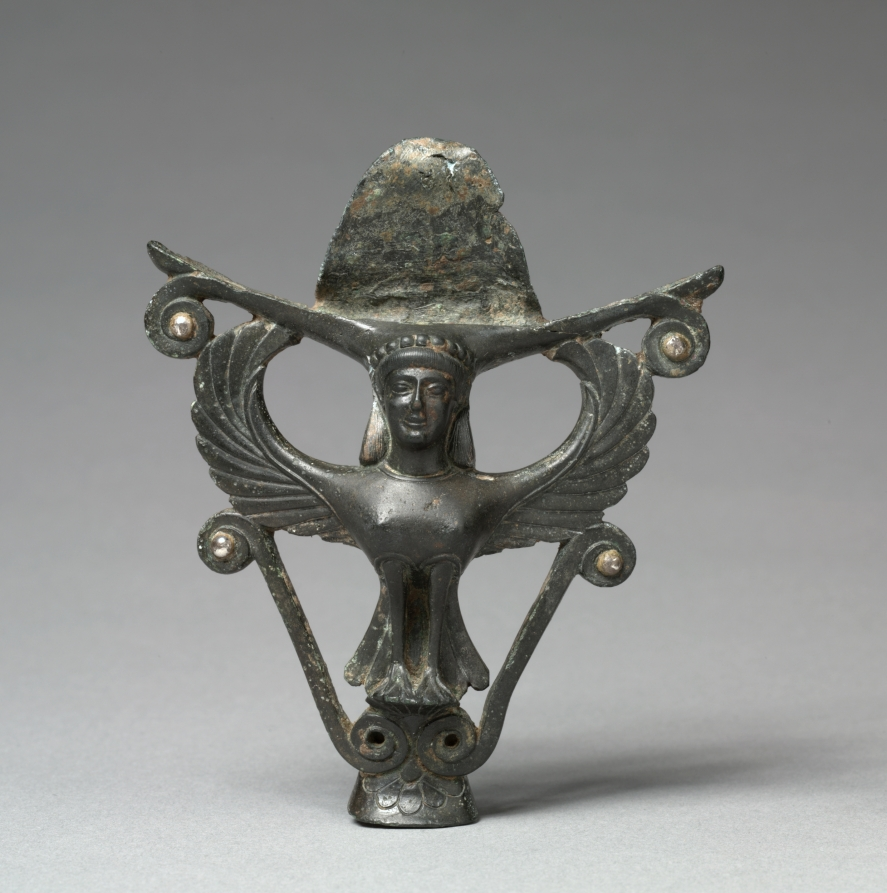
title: Mirror Support: Siren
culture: Greece, Corinth, presumably of Corinthian or Argive origin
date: c. 475 BCE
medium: bronze with silver inlays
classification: Sculpture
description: This is a bronze of exceptional quality. When complete, it had a cylindrical handle, probably of painted ivory. The reflecting disk was probably of silver, as are the inlays. The intact mirror was obviously an object of great luxury. Sirens (part bird and part woman) were sea-songstresses whose captivating voices drew sailors off course to their deaths. Sirens also accompanied the dead on their voyage to the underworld. The idea was probably imported from Egypt where human-headed ba birds embodied a deceased person's spirit.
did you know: This elaborate siren served a practical function, connecting a separately made handle and mirror, now lost.